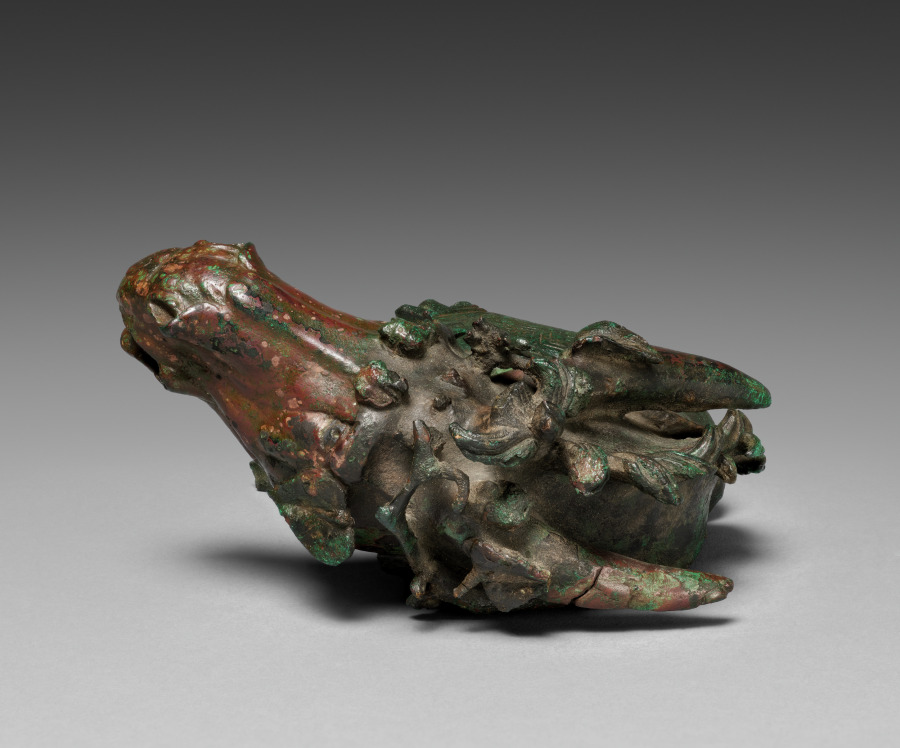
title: Mule-Head Attachment for a Couch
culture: Greece, Hellenistic period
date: 200–100 BCE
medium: bronze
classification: Sculpture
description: This bronze attachment in the shape of a mule’s head was once part of a fulcrum (armrest) for a banqueting couch. The mule’s mane flies upward, its mouth open and its ears pushed back against its head. The mule wears an ivy garland and a saddlecloth made from panther skin, two elements associated with the wine god Dionysos.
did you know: The pattern on the panther skin, called a meander, was also extremely popular on Greek pottery.